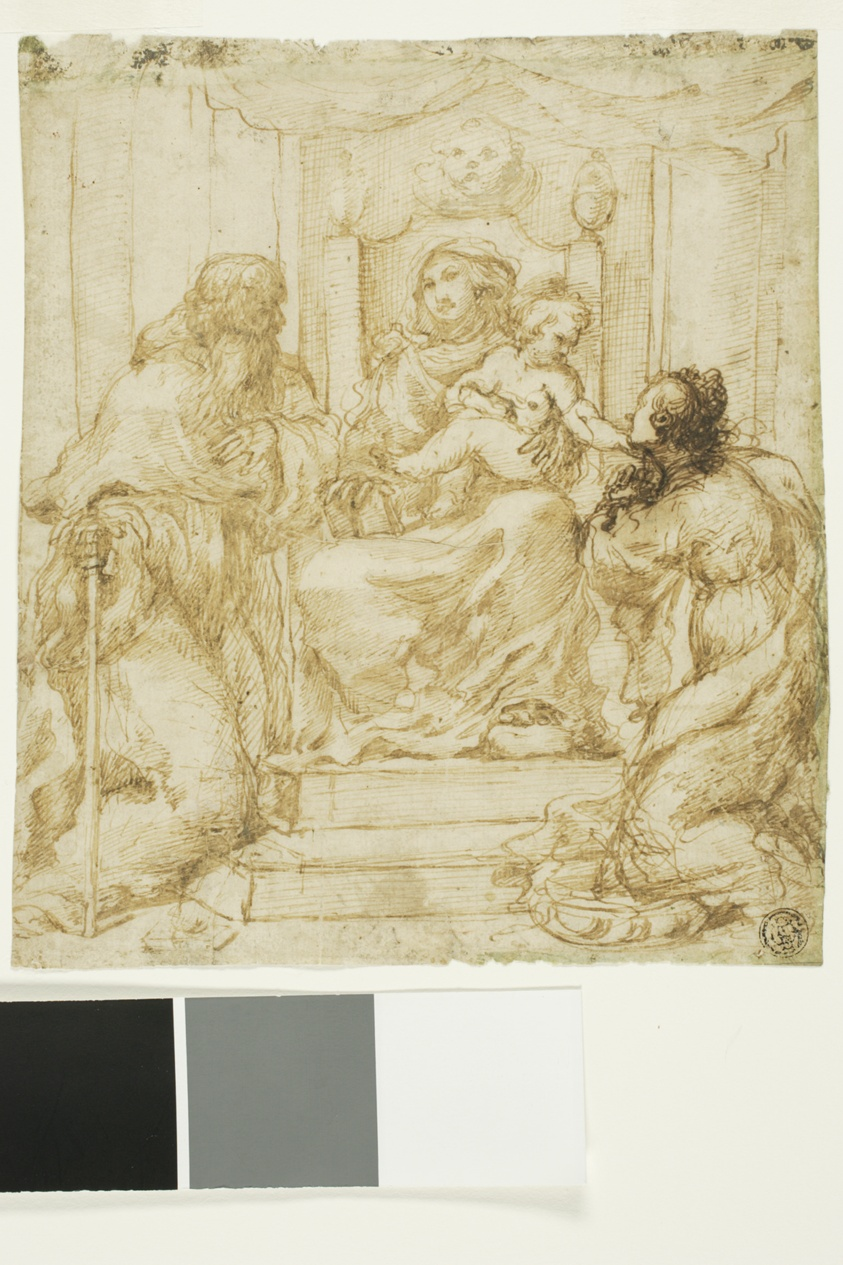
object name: Drawing and Watercolor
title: Virgin and Child with Saints Jerome and Catherine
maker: Attributed to Pietro Faccini; Italian, c. 1560-1602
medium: Pen and brown ink and iron gall ink, with gray wash, on ivory laid paper, laid down on buff laid paper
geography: Italy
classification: pen and ink drawings; drawings (visual works); prints and drawing